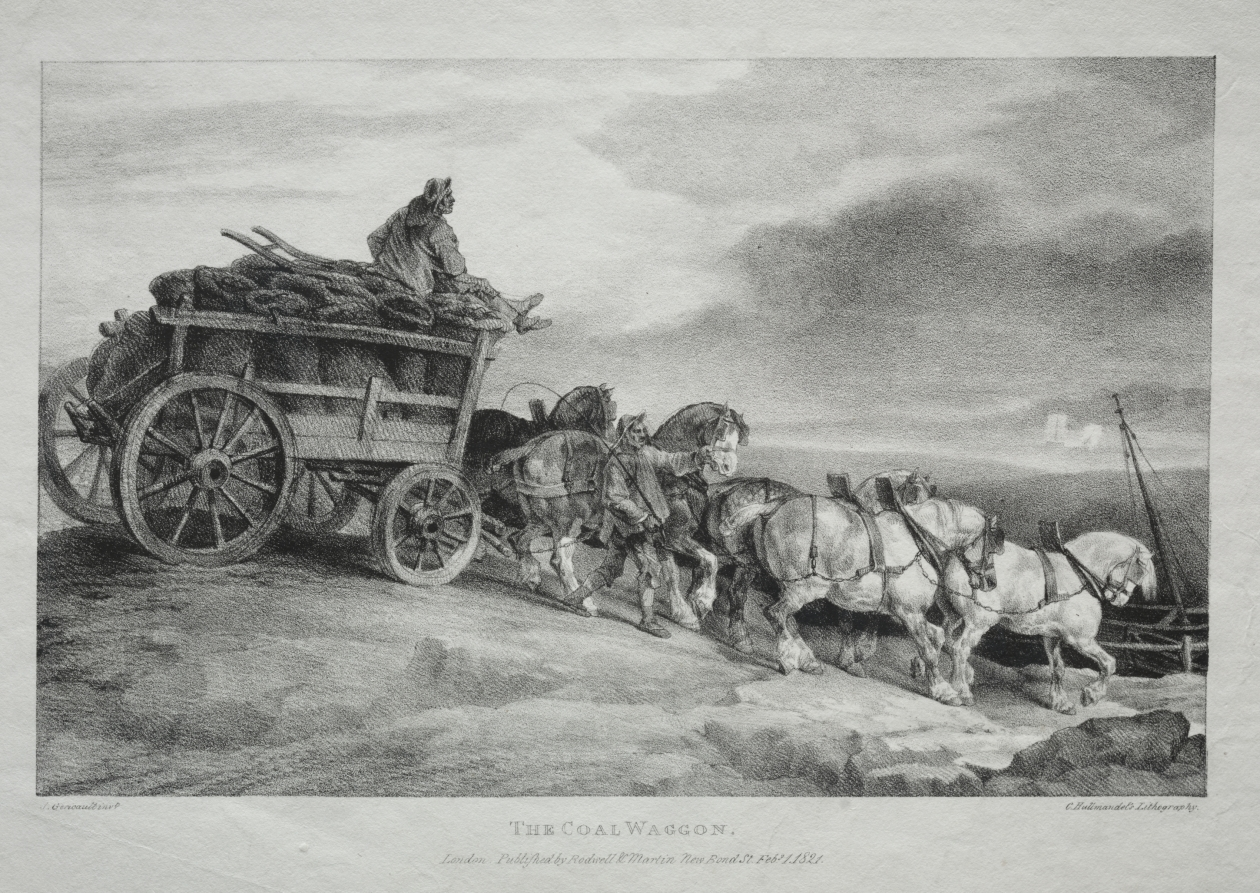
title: The Coal Wagon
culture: France, 19th century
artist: Théodore Géricault (French, 1791–1824)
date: 1821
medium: lithograph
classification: Print